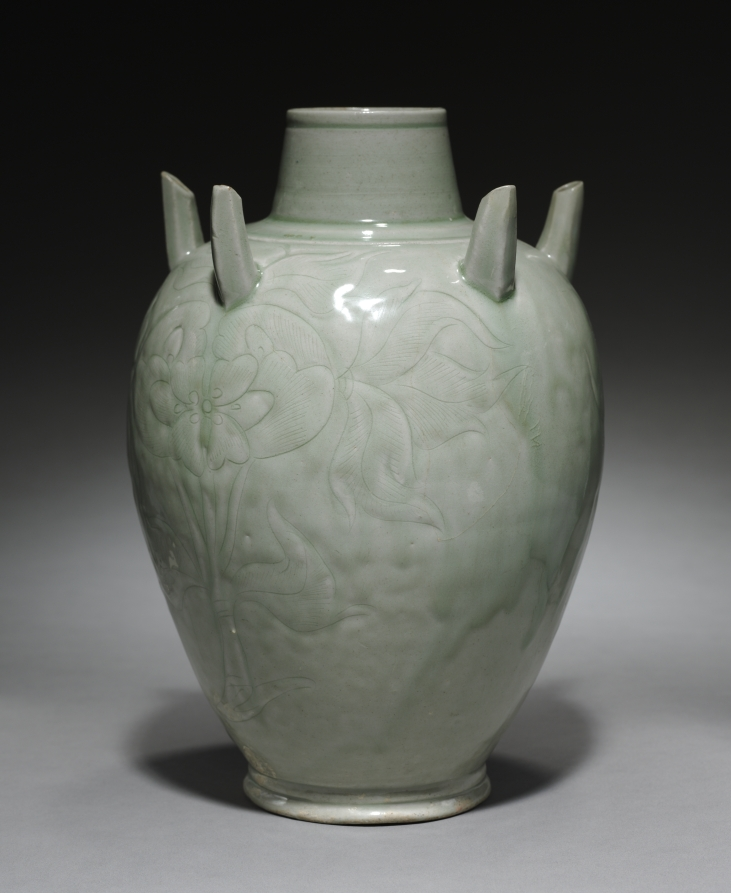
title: Vase with Peonies and Five Spouts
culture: China, Zhejiang province, Hangzhou, Southern Song dynasty (1127-1279)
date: 900s–1000s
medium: green-glazed porcelaneous stoneware with incised decoration, Yue ware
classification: Ceramic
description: "In full autumn wind and dew the kilns of Yue open; And a thousand peaks are despoiled of their halcyon green" (translated by S. W. Bushell). These 9th-century poetic lines glorify the highly prized green-glazed Yue wares of the Tang period. This later example has a pale green glaze that is glassy and consistent, which indicates a precise control of the glaze components as well the kiln atmosphere by reducing the amount of oxygen at some stage during the firing.